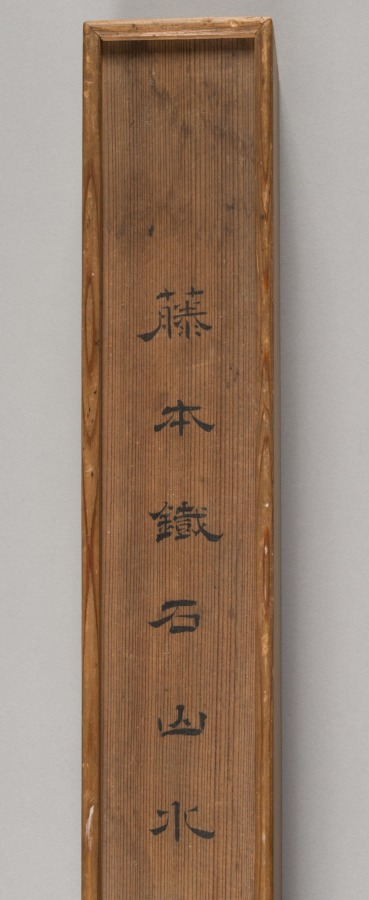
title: Landscape with Figures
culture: Japan, Edo period (1615–1868)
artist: Fujimoto Tesseki (Japanese, 1816–1863)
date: c. 1840–63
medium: hanging scroll; ink and color on paper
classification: Painting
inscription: Artist's inscription and two seals in upper right. A third seal in lower left.